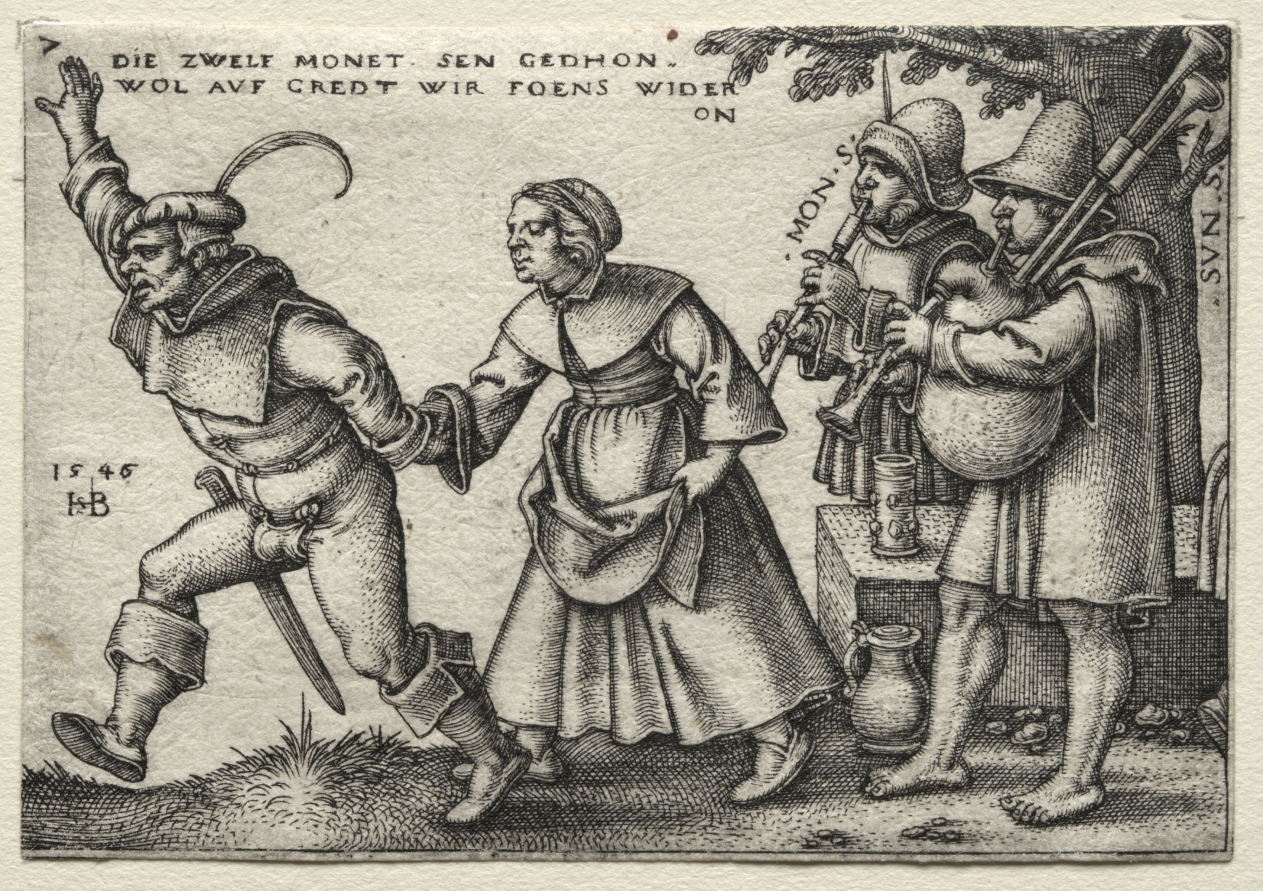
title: The Twelve Months: The Year's End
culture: Germany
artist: Hans Sebald Beham (German, 1500–1550)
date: 1546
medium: engraving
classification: Print